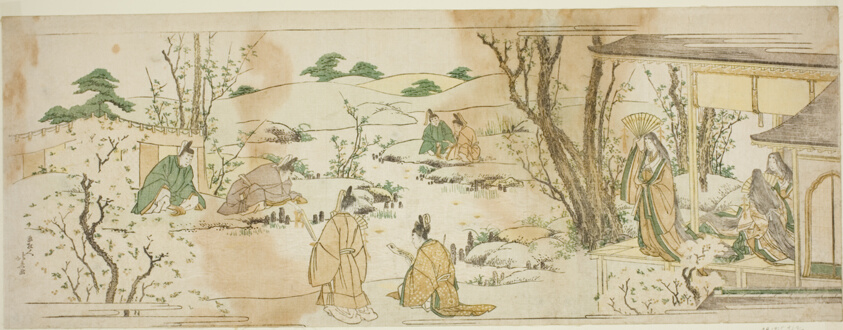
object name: Print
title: Courtly event modeled on the Lanting Gathering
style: Japanese (culture or style)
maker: Katsushika Hokusai 葛飾 北斎; Japanese, 1760-1849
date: c. 1801/07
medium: Color woodblock print; ebangire, surimono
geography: Japan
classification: woodblock print; print; asian art